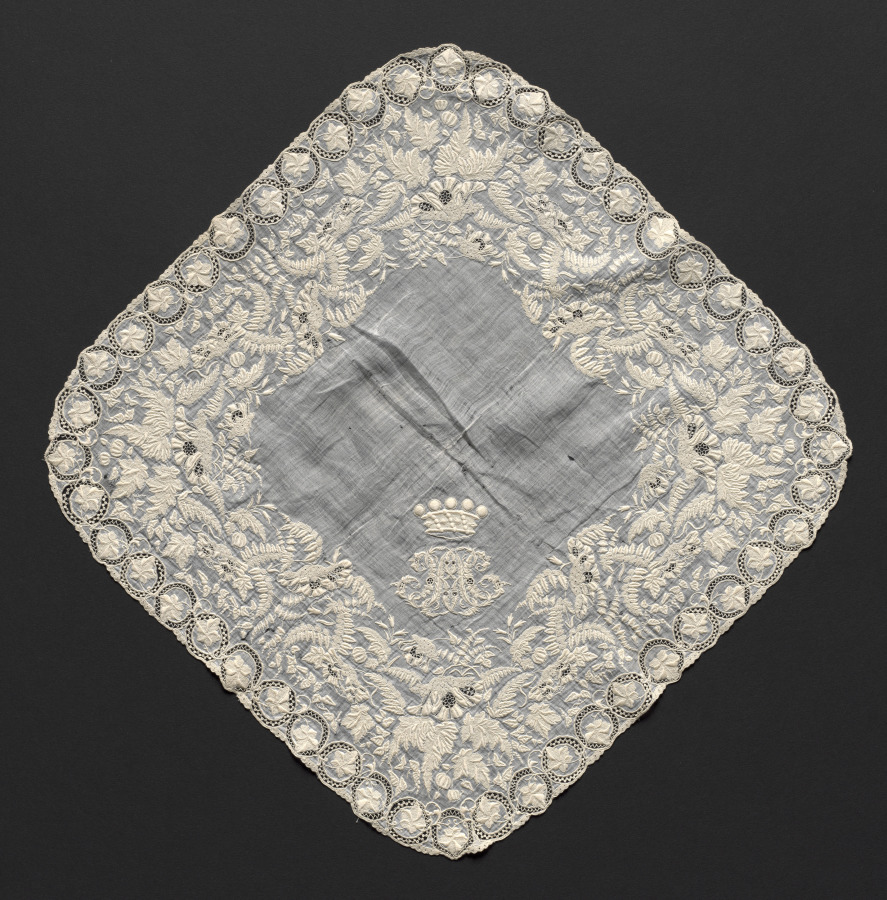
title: Handkerchief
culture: France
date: 1800–1820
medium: linen: embroidery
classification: Embroidery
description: Initials and a coronet are embroidered in one corner of this handkerchief.